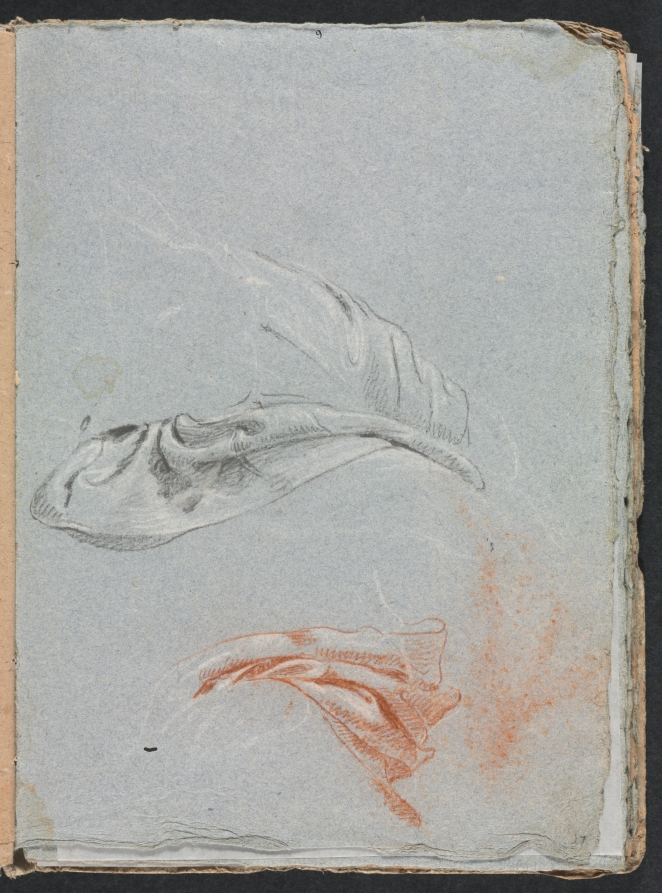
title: Verona Sketchbook: Drapery studies (page 17)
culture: Italy, 18th century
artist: Francesco Lorenzi (Italian, 1723–1787)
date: 1760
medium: black and red chalk with white heightening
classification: Bound Volume